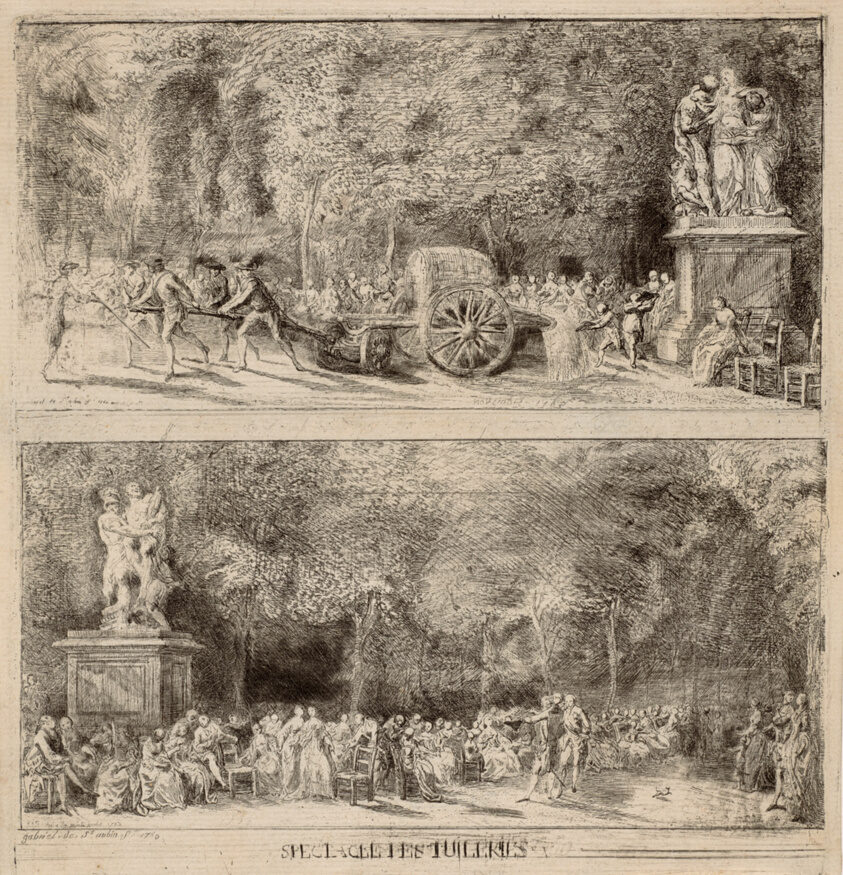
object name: Print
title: Scenes from the Tuileries: The Chairs and the Water Cart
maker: Gabriel Jacques de Saint-Aubin (French, 1724-1780)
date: 1760, retouched 1763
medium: Two etchings from one plate, touched with drypoint on ivory laid paper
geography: France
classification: etching; print; prints and drawing